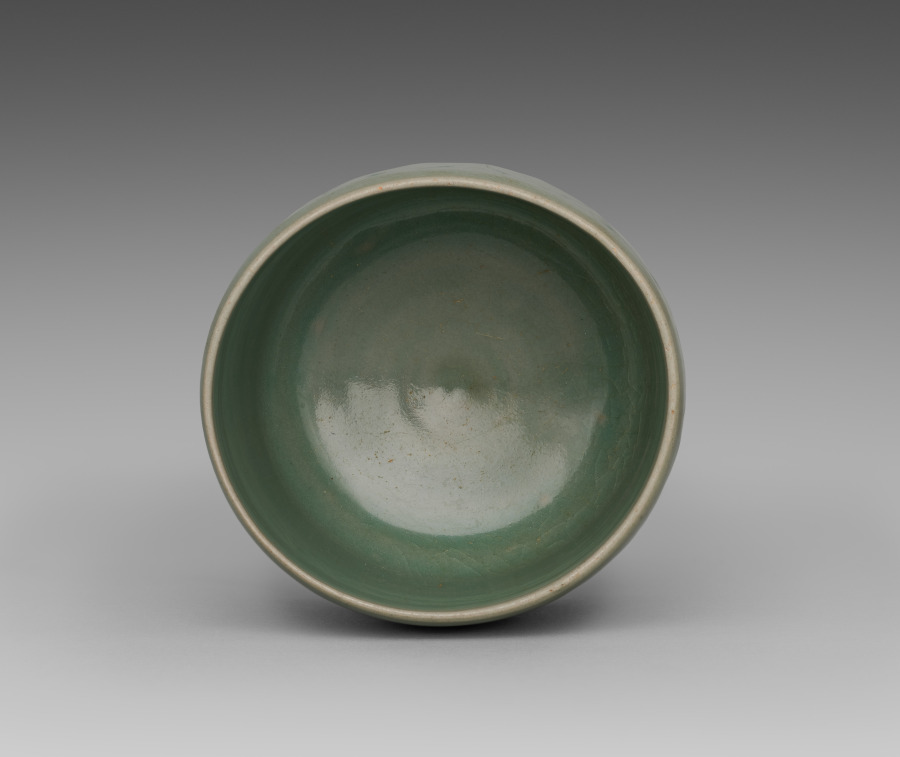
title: Celadon Cup with Molded Lotus Petal Design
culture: Korea, Goryeo dynasty (918–1392)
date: 1100s–1200s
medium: Celadon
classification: Ceramic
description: Celadon wares intended for everyday use—such as this dish—were among the most common burial objects placed in tombs during the Goryeo period (918–1392). Furnishing tombs with elaborate assemblages of objects was believed to honor the deceased and provide comfort in the afterlife. This dish, featuring the lotus petal motif, was likely a cherished possession that accompanied its owner to their final resting place.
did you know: The outer wall of this teacup is decorated with the image of lotus flower petal, a symbol of purity and salvation.